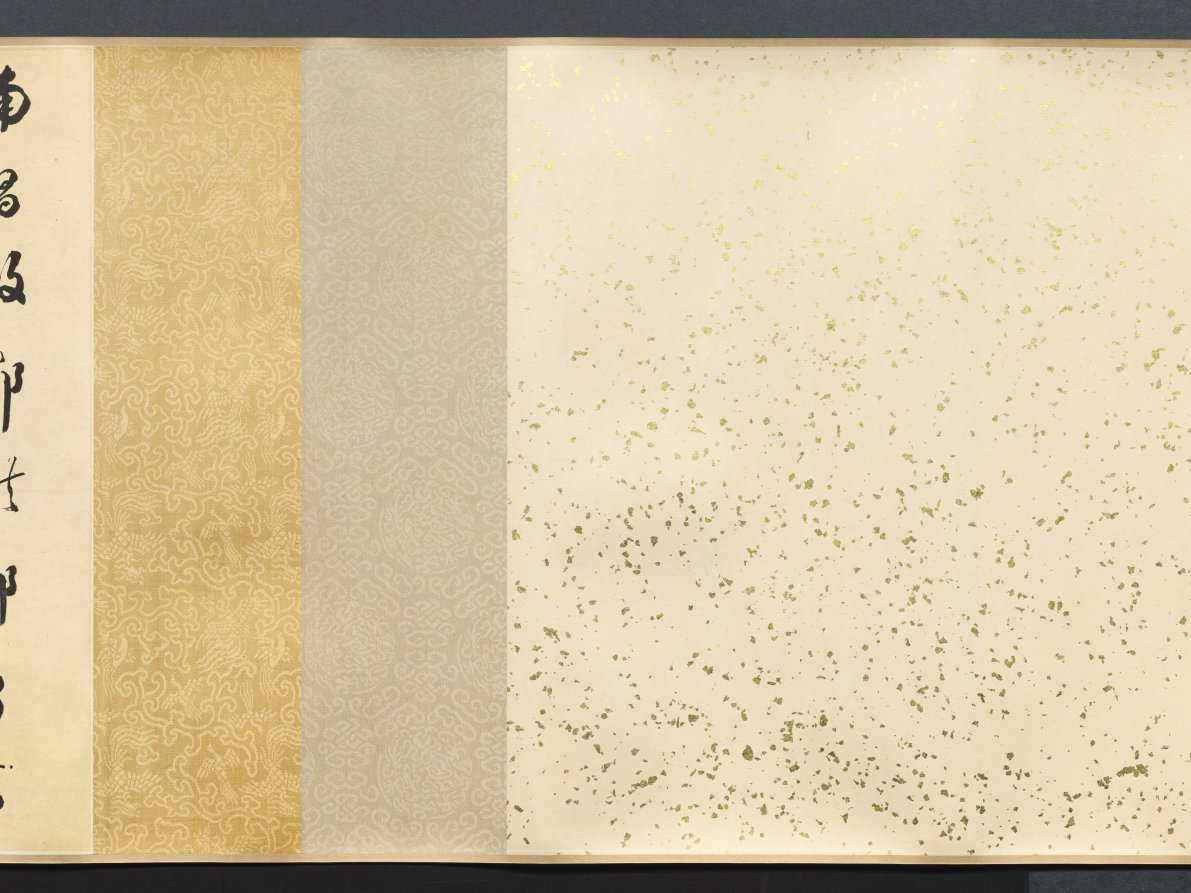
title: Calligraphy in Running Style based on Wang Bo's Essay on Tengwang Pavilion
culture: China, Changbai, Qing dynasty (1644-1911)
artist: Tiebao (Chinese, 1752–1824)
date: 1811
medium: handscroll, ink on paper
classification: Calligraphy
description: A member of the Donggo clan, Tiebao belonged to the Manchu Plain Yellow Banner army. As an official in the Qing court, he endured considerable vicissitude and his career was never smooth. Celebrated as a man of letters, he oversaw the publications of the Manchu military system as well as an anthology of poems by members of the imperial family and other Manchu dignitaries. In calligraphy, he was regarded as the equal of such eighteenth-century luminaries as Liu Yong (1720-1805) and Weng Fanggang (1733-1818). This handscroll is a work of his mature years and is exemplary of his disciplined and highly subtle approach to the art of calligraphy.